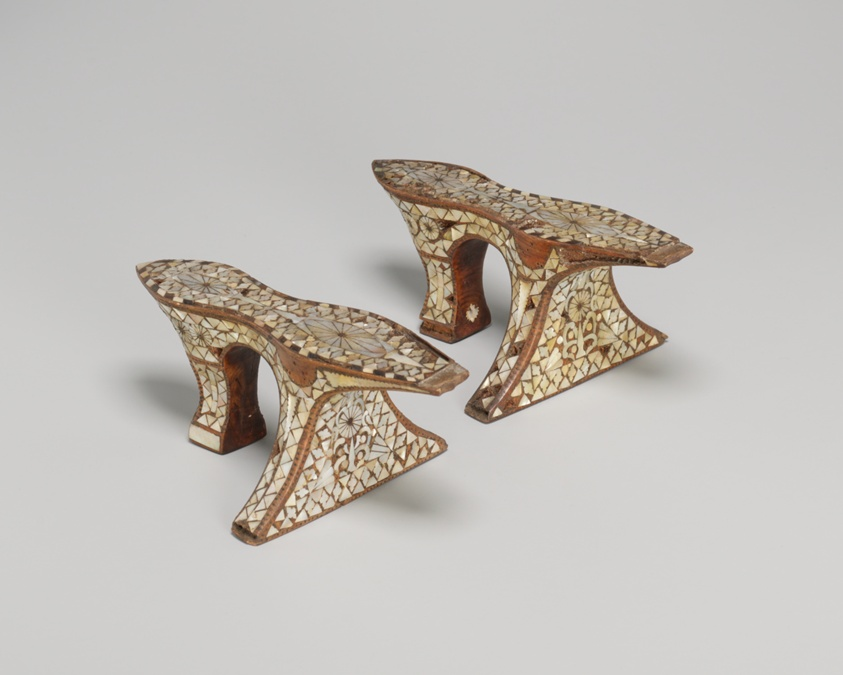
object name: Textile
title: Pair of Clogs (Qabqab)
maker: Algeria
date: Mid–19th century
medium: Wood inlaid with mother of pearl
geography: Algeria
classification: textile; costume accessory - shoe; shoes - misc; costume; dress (garment); clothing